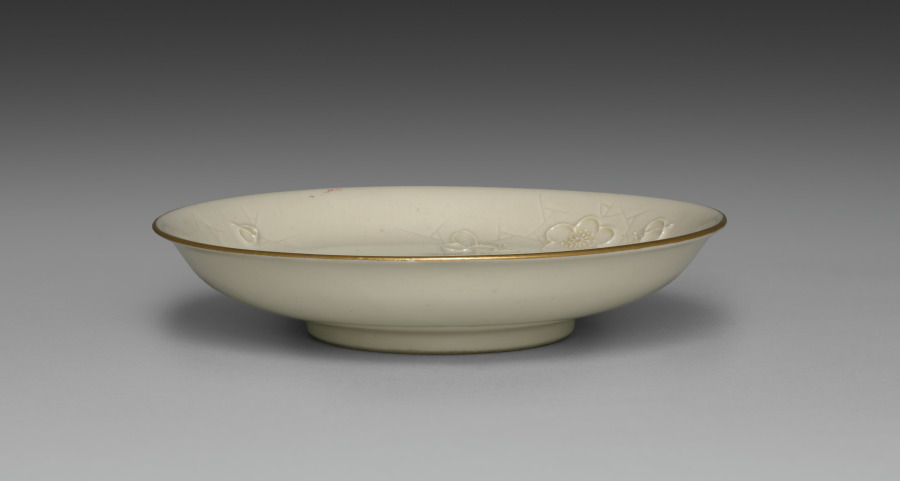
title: Medium-sized Dish from Dining Set with Plum Blossoms and Cracked-Ice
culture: Japan, Meiji period (1868–1912)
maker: Seifū Yohei II (Japanese, 1844–1878)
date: c. 1875–78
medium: Porcelain with molded designs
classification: Ceramic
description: Each item in this set has a delicate low-relief design of flowering plum branches over scattered, intersecting lines meant to resemble the cracked-ice surface of a frozen body of water and is signed on the base in gold pigment. While Yohei II produced many fine works in underglaze blue, like those produced by Kiyomizu Shichibei, he also made works in quite different styles later in his career, from the early 1870 s. In 1873, he was appointed purveyor to the Industrial Center of Kyoto Prefecture, a designation associated with Kyoto’s efforts to reach an international market through the port of Kobe; and from 1875 until his death, he was involved in national-level projects to present Japanese ceramics across the world. It was during this period that Yohei III was apprenticed to Yohei II, and it has been suggested that this set may in fact be an early example of Yohei III’s work, which he signed with his teacher’s name. Decorated with flowers resembling Japanese textile motifs, the set calls to mind the design of Yohei II’s pair of vases with plum blossoms in the Victoria and Albert Museum. Here, the elaborate trees created for a formal public exhibition setting have been translated into the approachable blossoms of the genteel domestic environment. While the designs are consistent across the pieces, each raised flower petal and pistil and each incised line in the ice was done by hand, so the cups, bowls, and dishes are similar yet unique. The bottoms of two boxes once identified the set’s owner, but the information has been deliberately obscured with black ink. However, inscriptions still visible appear to indicate two occasions, once at the end of July 1886 , and once again in June 1916 , when parts of the set were requested from Hokura in Niigata Prefecture. The location corresponds to a neighborhood in the present-day city of Jōetsu. The surname Tsuji 辻 also appears on a paper tag affixed to one of the box cloths. Future research may possibly reveal more about their provenance. A vase by Yohei III in a private collection combines the formal grandeur of the Yohei II vases in the Victoria and Albert Museum with the gentler design of this dining set, placing flowering plum trees against soft, scalloped-edge clouds resembling those in golden screens.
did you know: The dining wares have a creamy white coloration that the four boxes containing them identify as Korean in style.